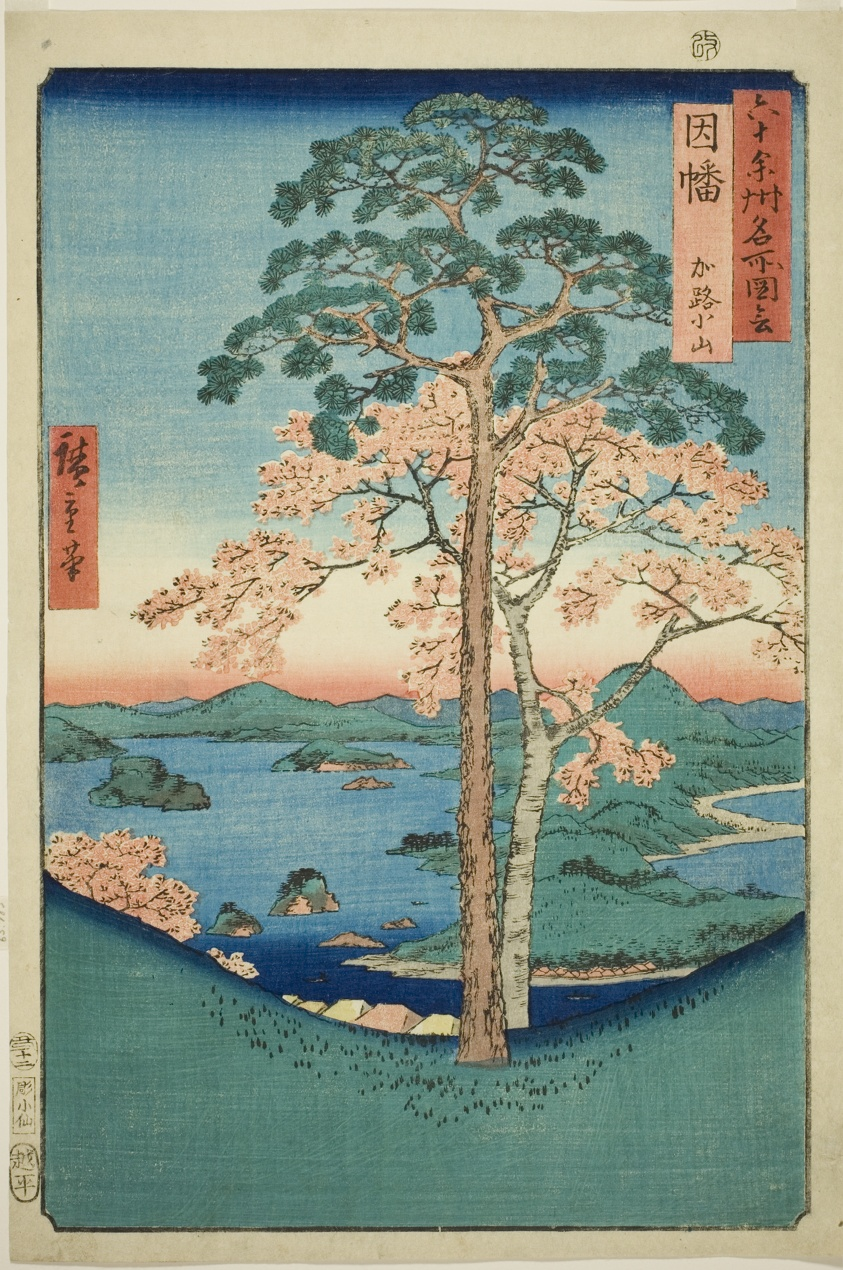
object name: Print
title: Inaba Province: Karo, Koyama (Inaba, Karo Koyama), from the series "Famous Places in the Sixty-odd Provinces (Rokujuyoshu meisho zue)"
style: Japanese (culture or style)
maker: Utagawa Hiroshige 歌川 広重; Japanese, 1797-1858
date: 1853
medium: Color woodblock print; oban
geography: Japan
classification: woodblock print; print; asian art